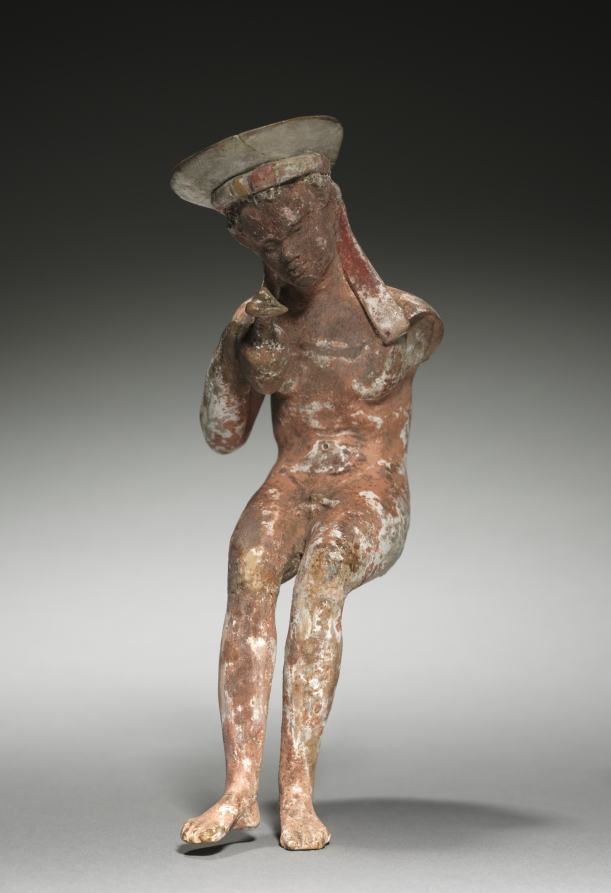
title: Seated Man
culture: Greece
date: 400–300 BCE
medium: painted terracotta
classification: Sculpture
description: This statuette takes the form of a seated male figure, nude but for a large headdress or hat with a yellow and red–striped ribbon beneath it. The ends of the ribbon trail down over each shoulder. In his right hand he holds a pitcher, and his left arm is missing below the shoulder. His entire body is painted a pinkish red over a white slip.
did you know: The pitcher in the figure’s hand, called an oinochoe, was used in ancient Greece to pour wine.